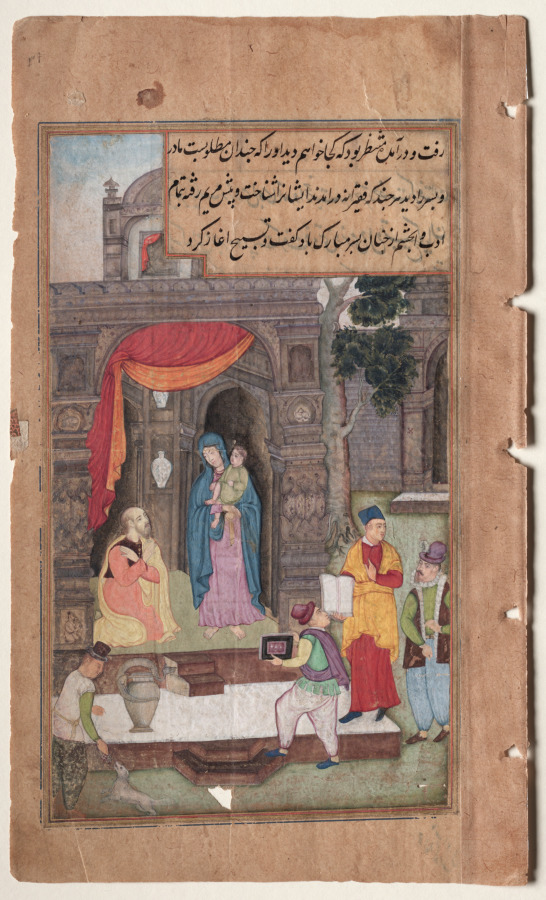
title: Simeon Kneels in Front of Mary and Jesus after Recognizing Them (folio 40 recto), from a Mirror of Holiness (Mir’at al-quds) of Father Jerome Xavier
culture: Mughal India, Allahabad, made for Prince Salim (1569–1627)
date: 1602–4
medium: Gum tempera, ink, and gold on paper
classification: Manuscript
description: Simeon had heard a prophecy that he would encounter the Messiah with his mother in the temple at Jerusalem. This painting depicts his moment of recognition that the prophecy had come true. The temple is populated by Jewish teachers and scholars, and a number of unusual visual elements. A dragon-headed vase is set by the stairs, and niches for vases flank the entrance, possibly in reference to Mary’s status as a vessel for the divine. The form of the temple itself seems to be an imaginative combination of Hindu temple architecture and a Mughal palace.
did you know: A man in the lower left offers grapes to a dog.